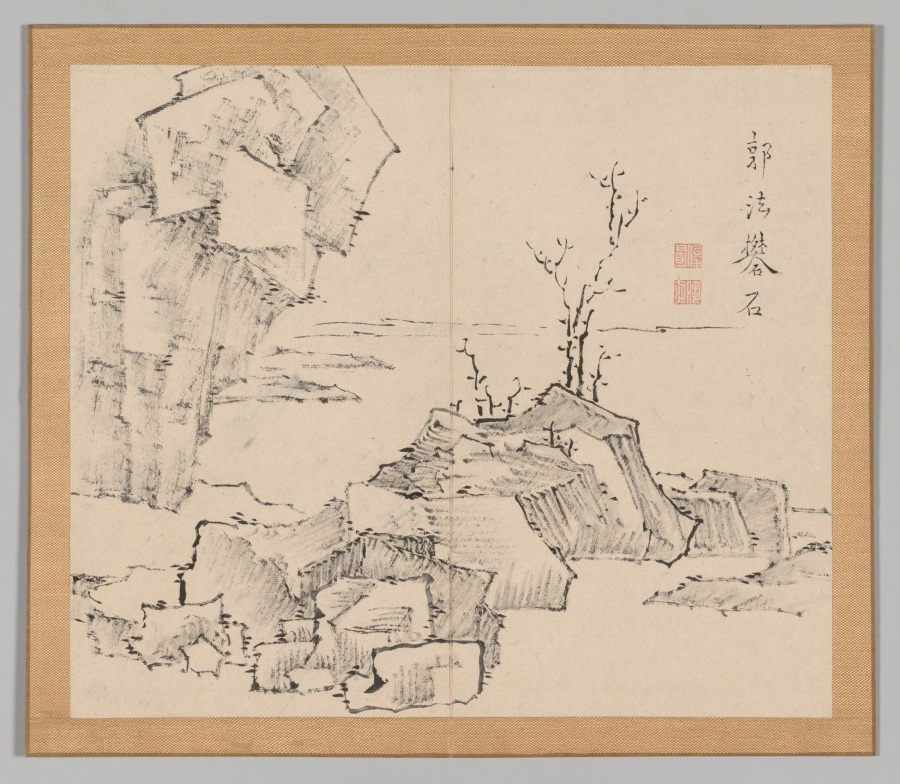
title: Reverberations of Taiga, Volume 1 (leaf 23)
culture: Japan, Edo period (1615–1868)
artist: Aoki Shukuya (Japanese, d. 1802)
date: mid-1700s–1802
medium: double-leaf from a pair of albums; ink and light color on paper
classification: Portfolio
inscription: 郭法礬石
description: Aoki Shukuya was a top student of painter Ike Taiga and took responsibility for Taiga’s stylistic legacy. A painting album by Taiga, part of which survives today in Kyoto in hanging scroll format, served as the source for this painting by Shukuya and the matching designs from a set of wood-block–printed volumes published in 1804. The postscript to the books, written and carved by the scholar Minagawa Kien (皆川淇園) (1735–1807), explains that Taiga produced the original album for his wife and fellow painter Tokuyama Gyokuran (徳山玉瀾) (1727/28–1784). Complex rock formations are accompanied by the text “Guo’s method for alunite” (郭法礬石) in a design from the second volume of the wood-block–printed set and Shukuya’s painting. This is a reference to the Northern Song–dynasty (960–1127) painter Guo Xi (郭熙) (Chinese, about 1020–1090) and a pale, often whitish mineral that forms naturally when volcanic rocks are altered by hot, acidic water.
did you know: Traditionally, young painters in Japan began their studies with an established master painter. The master's compositions invariably became models that the apprentice copied to learn various ink and brush techniques.